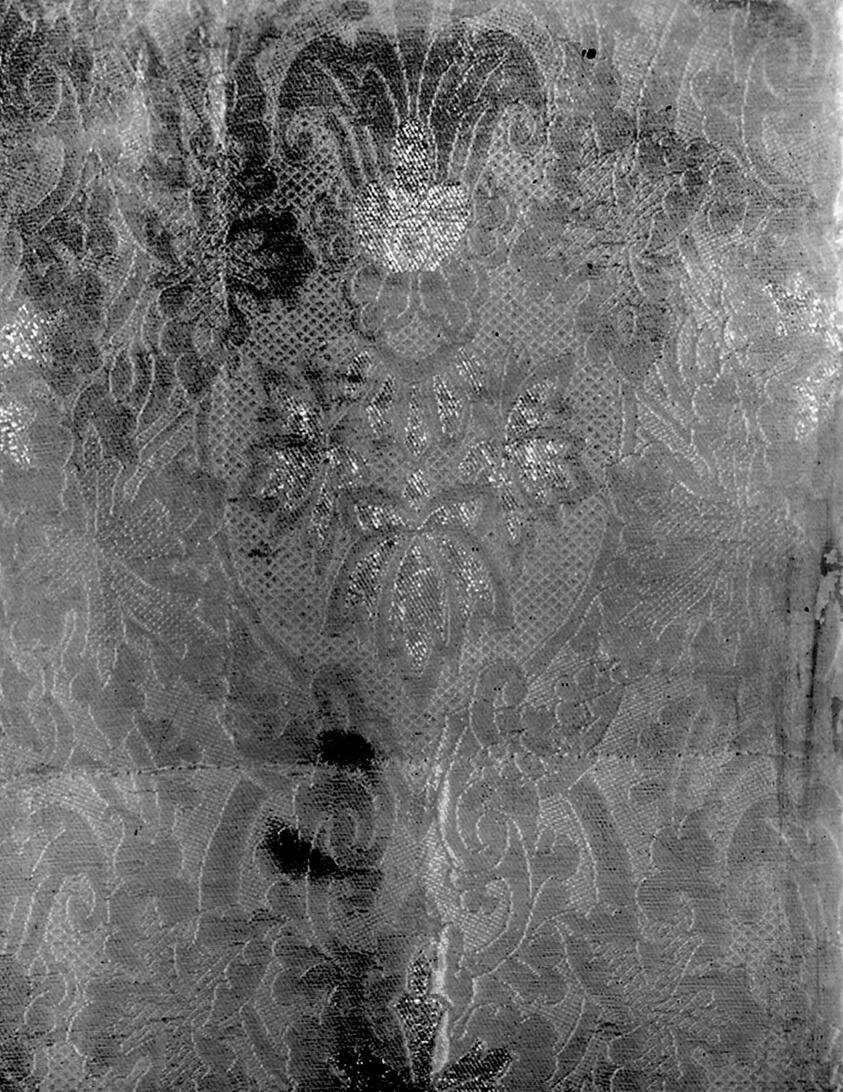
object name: Textile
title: Panel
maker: Russia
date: 1875/1900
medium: Brocaded plain compound cloth (research card)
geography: Russia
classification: textile; weaving